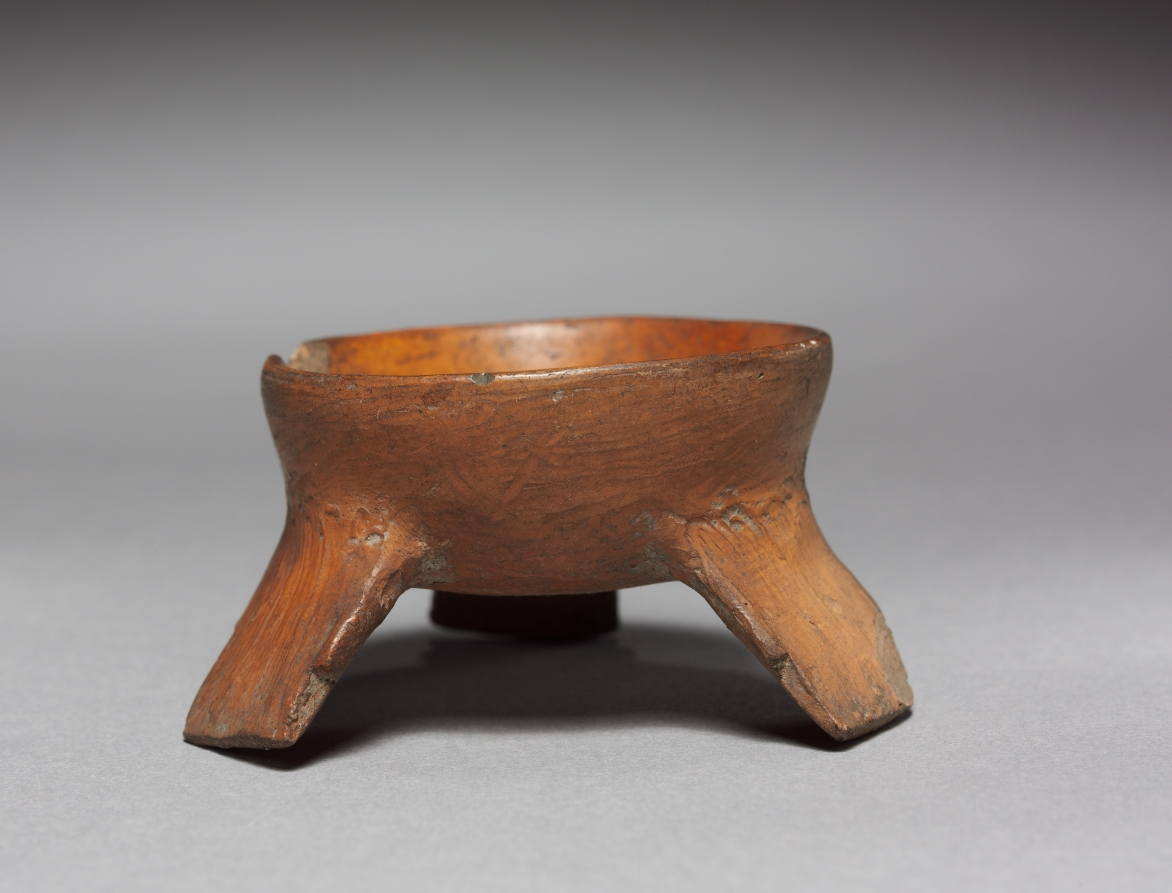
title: Tripod Dish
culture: Mexico, Aztec, 14th-16th century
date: 1325–1521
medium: terracotta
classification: Ceramic